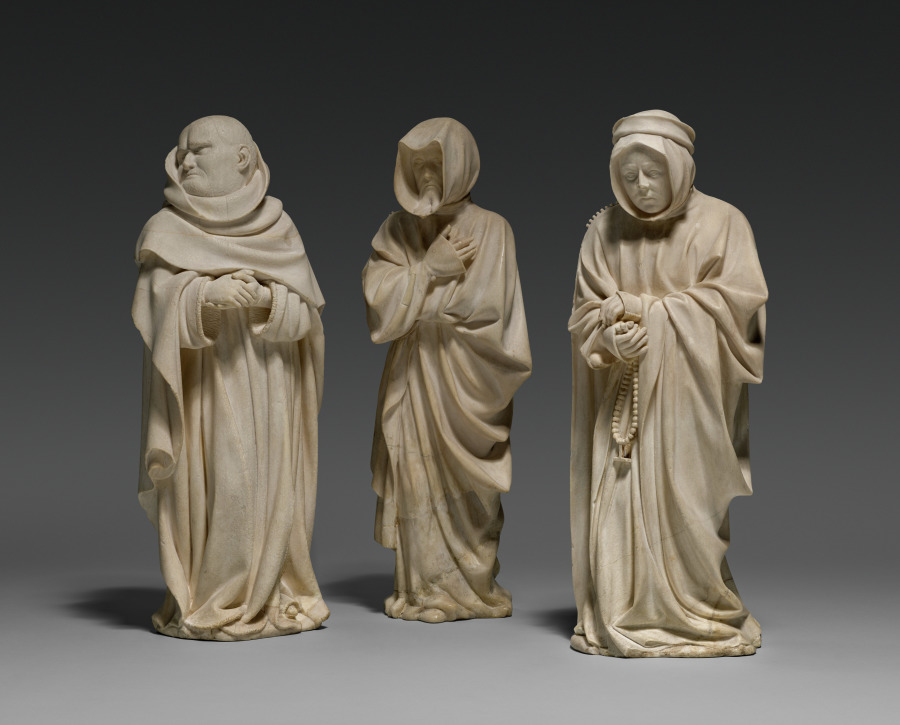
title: Mourner from the Tomb of Philip the Bold, Duke of Burgundy (1364–1404)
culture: Netherlands, active Dijon, 15th century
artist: Claus de Werve (Netherlandish, 1380–1439)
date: 1404–10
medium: vizille alabaster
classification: Sculpture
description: This figure comes from the tomb of Duke Philip the Bold from the church of Champmol near Dijon (Burgundy, France). Philip, who founded the monastery and designated it as his burial place, hired the best artists, many of whom came from the Netherlands. While the commission was given in 1381, the work was not completed until 1410, six years after the duke’s death. This mourner is unusual for the time because it is not carved as a static low relief on the pedestal of the tomb but interacts with the viewers and their fellow procession members. The lifelike quality of the figure is due in large part to the alabaster. Its softness allowed artists to carve details into the material, and the transparent, milky white stone could also be polished to a high gloss.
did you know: A plaster cast of this mourner decorates the empty niche in the Tomb of Philip the Bold in Dijon, France.